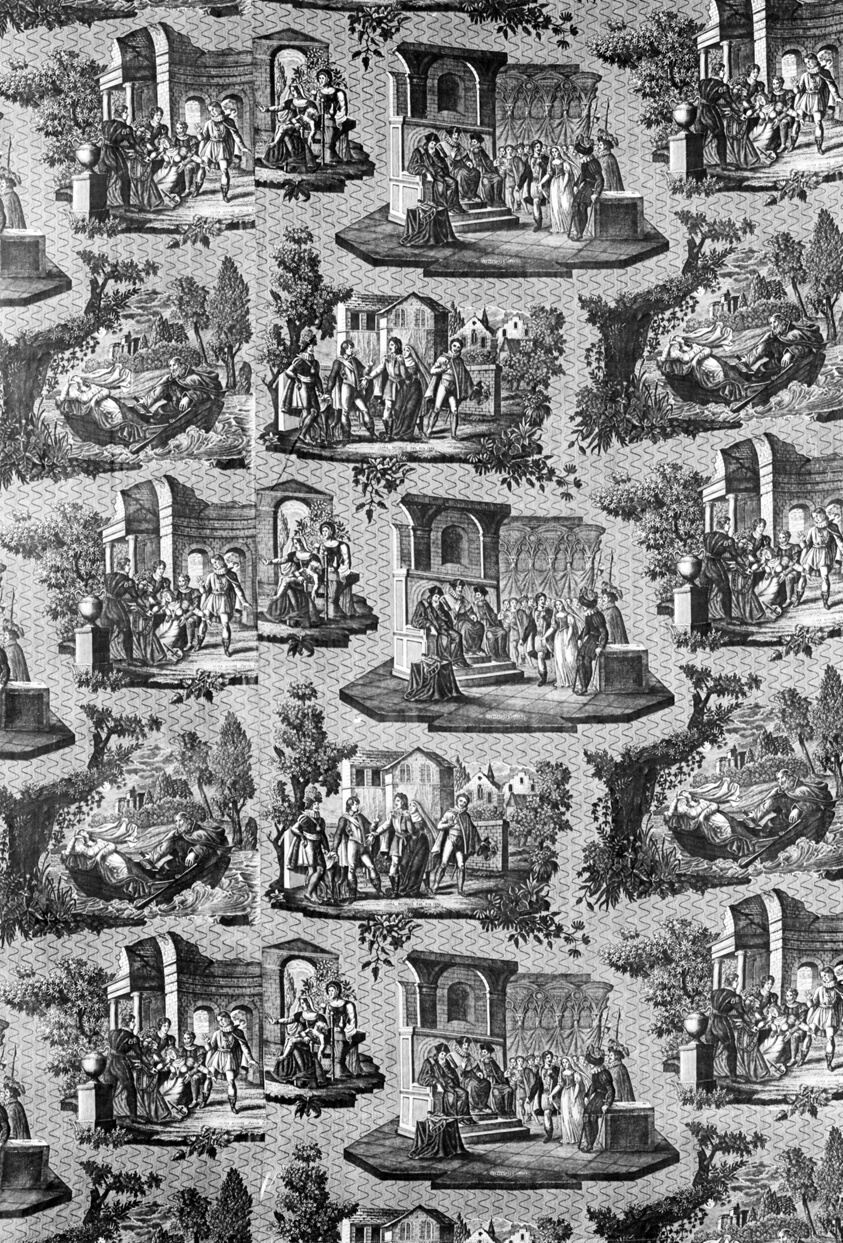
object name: Textile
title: Judgement of Clara (Furnishing Fabric)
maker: Designed by Alexandre Buquet (French, 1802–1865); France, Rouen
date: c. 1815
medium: Cotton, plain weave; engraved roller printed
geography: Rouen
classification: textile; weaving - printed; furnishing textile